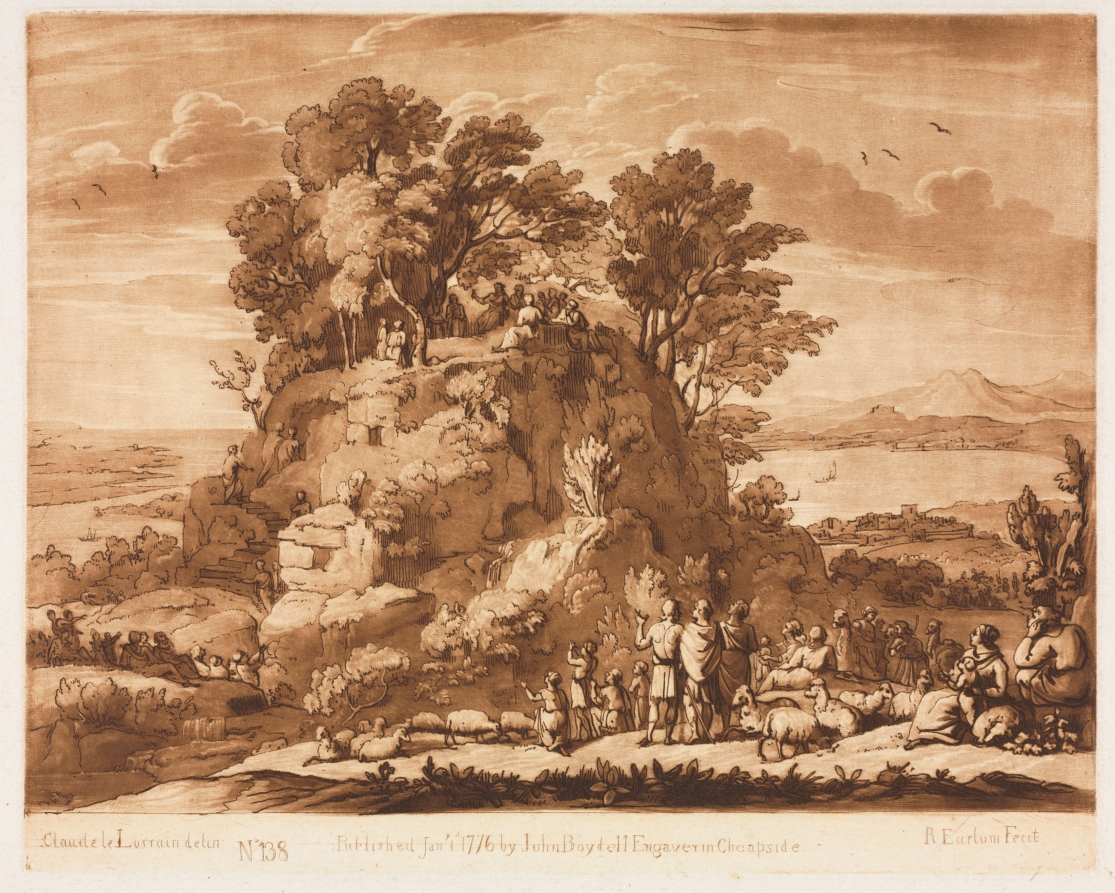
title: Liber Veritatis: No. 138, A View of the Sea, with Christ Preaching on the Mount (the water below may probably be intended for the Sea of Tiberius)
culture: England, 18th century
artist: Richard Earlom (British, 1743–1822)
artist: after Claude Lorrain (French, 1604–1682)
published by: John Boydell (British, 1720–1804)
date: 1776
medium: etching and mezzotint printed in brown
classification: Print